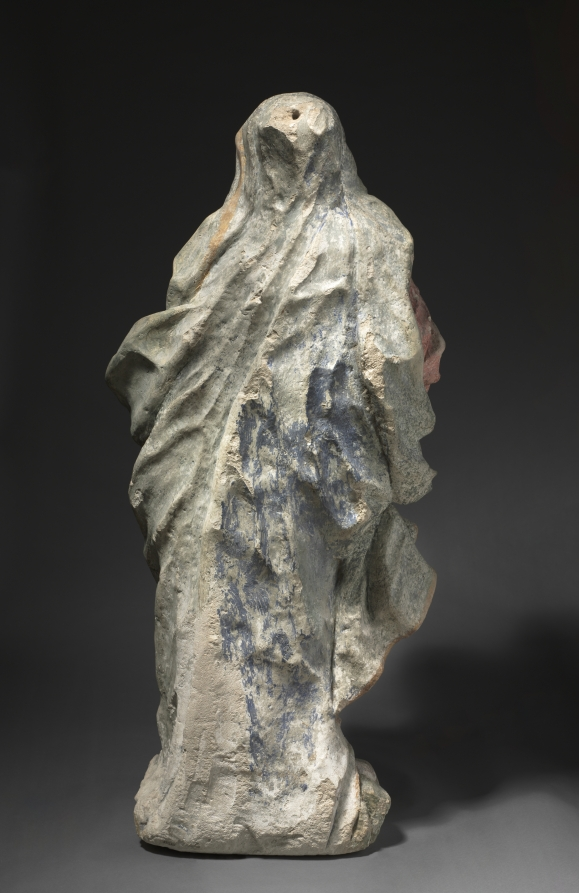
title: Mourning Mary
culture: Austria, Vienna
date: c. 1710–40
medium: stone with traces of original color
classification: Sculpture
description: This figure’s orientation suggests it may have been part of a Crucifixion group, situated to the left of Christ with another figure to the right to balance the composition. Fingers knotted in prayer, lips parted in anguish, the Virgin appears to recoil from the sight of her son on the cross. Her contorted pose and agitated draperies are visible manifestations of her grief. Obvious signs of wear to the stone suggest that the group may have been set outside of a church, perhaps atop pillars.